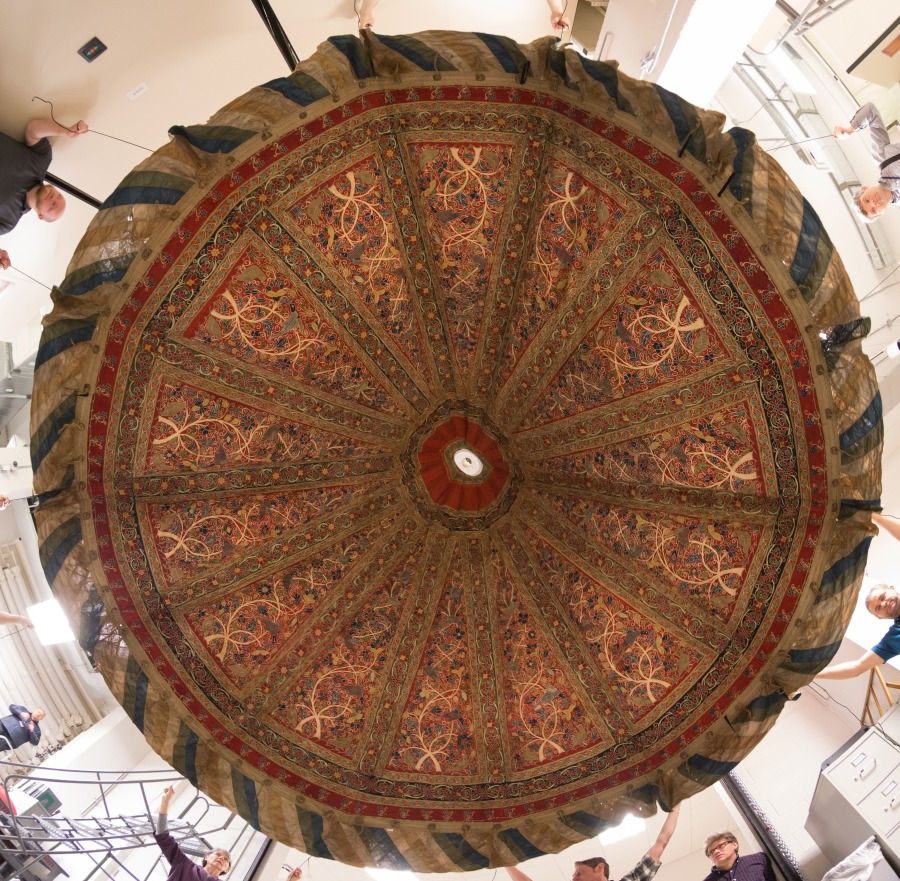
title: Royal Round Tent made for Muhammad Shah (Roof)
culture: Iran, Rasht, Qajar period (1779-1925)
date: 1834–48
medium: Interior: wool: plain weave, inlaid work; silk: embroidery, chain stitch; tape, leather; Exterior: cotton, wool: plain weave; rope, iron ring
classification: Textile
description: Royal tents were potent symbols of authority, wealth, and power throughout the greater Middle East. Rulers owned thousands of tents. They were used for shelter, shade, and innumerable functions in tent compounds that were essential for imperial ceremonies, travel, and military campaigns. Distinguished by size with elaborately decorated interior walls and ceilings, tents could be as large as castles. Opulent tents were also presented as imperial gifts. Tents are only known through documents before 1600. For example, in Baghdad in 809, Caliph Harun al-Rashid owned 4,000 ceremonial tents and 150,000 camping tents that were stored in the imperial Abbasid treasury. An astonishing variety and quantity of tents were housed in the royal Fatimid tent storeroom in Cairo in 1068-69, including "military tents, fortress tents, and castle tents, manufactured of . . . gold-brocaded stuff embroidered with designs of elephants, wild beasts, horses, peacocks, birds." Since 1600, Ottoman Turkish tents with elaborate floral decoration have been preserved in Istanbul in the Topkapi Palace Museum and Military Museum, and in European collections as war booty, primarily from the Ottoman Turks' attempt to conquer Vienna in 1683. These tents are not done in the Rasht technique, but rather are applique. In contrast, royal tents from Iran are extremely rare. This spectacular ceremonial tent is embroidered with the name of its owner, Muhammad Shah, who ruled Iran from 1834 to 1848 during the Qajar dynasty. The radiant jewellike interior features exuberant flora, blossoming vines, and robust birds made with colored wool embellished with silk-thread embroidery.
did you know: Rasht work is named after the city on the Caspian Sea in present-day Iran, which was a major silk trade center with numerous textile workshops.